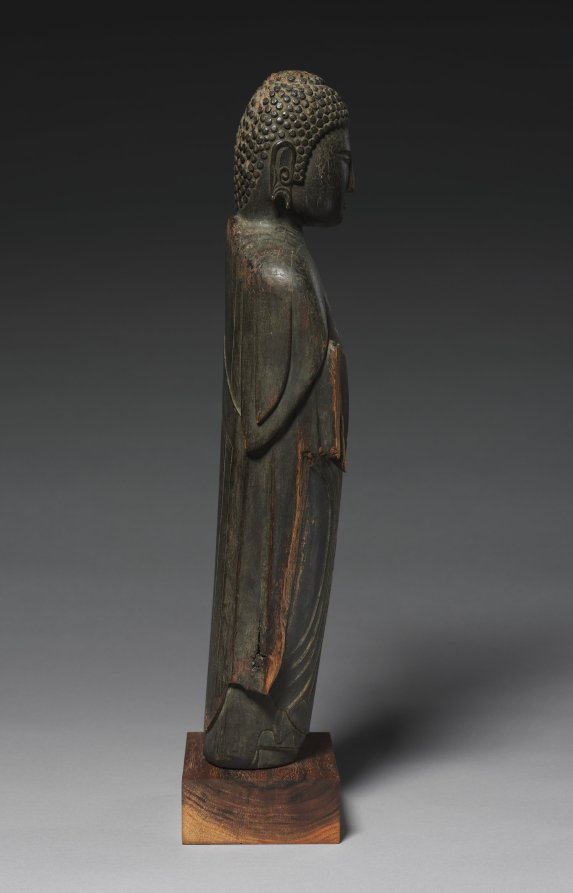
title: Sakyamuni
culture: Korea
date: 1900s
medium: wood with traces of black lacquer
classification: Sculpture